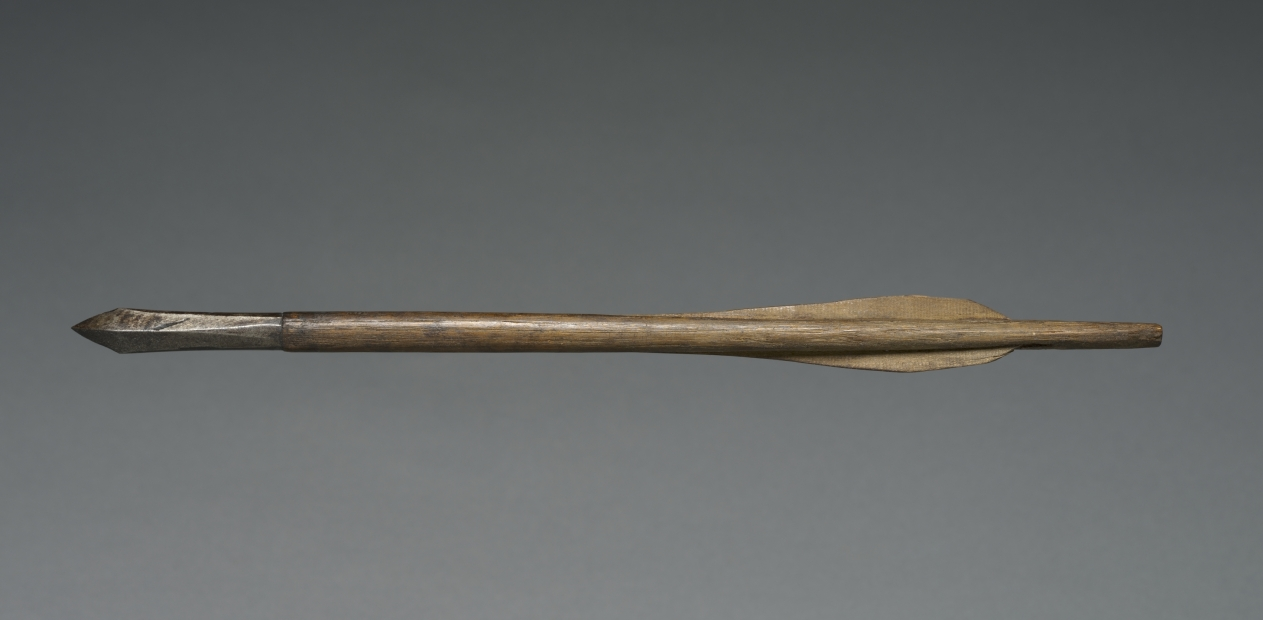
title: Crossbow Bolt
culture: Germany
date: 1500s–1600s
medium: wood, leather, steel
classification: Arms and Armor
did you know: Bolts with leather feathering were used mainly in the Tyrolean area, which includes northern Italy and western Austria.